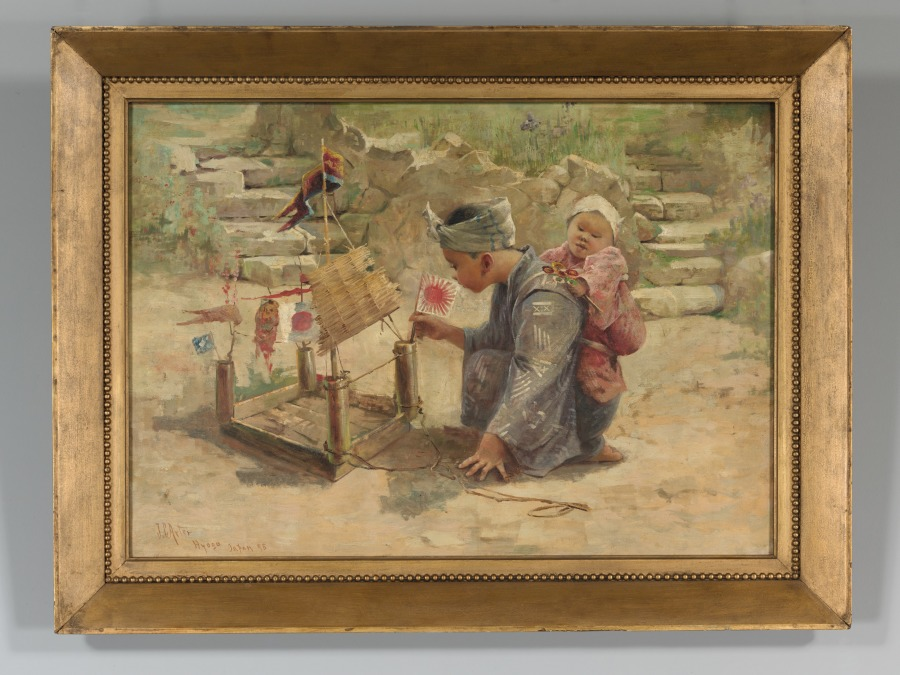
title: Japanese Boy Building a Man-of-War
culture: America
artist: J. C. Arter (American, 1859–1923)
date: 1895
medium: oil on canvas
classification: Painting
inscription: signed lower left: J. C. Arter / Hyozo / Japan 95